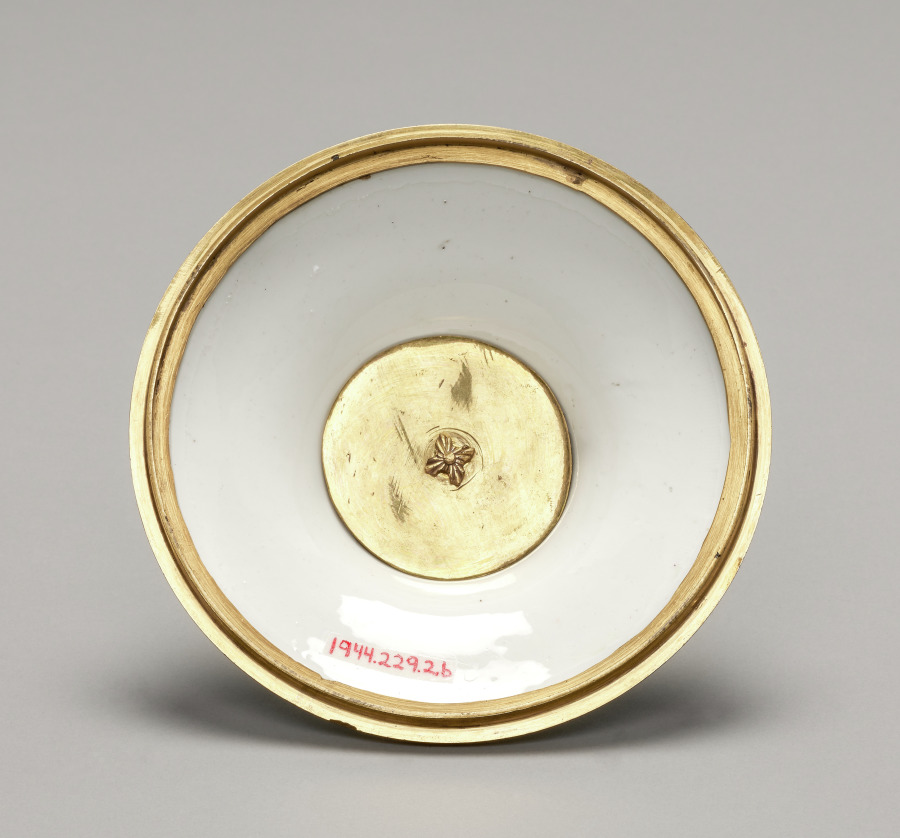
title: Cover for a Vase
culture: Germany, Meissen, 18th century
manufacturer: Meissen Porcelain Factory (German, est. c. 1710)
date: 1749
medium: porcelain mounted in gilt bronze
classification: Ceramic